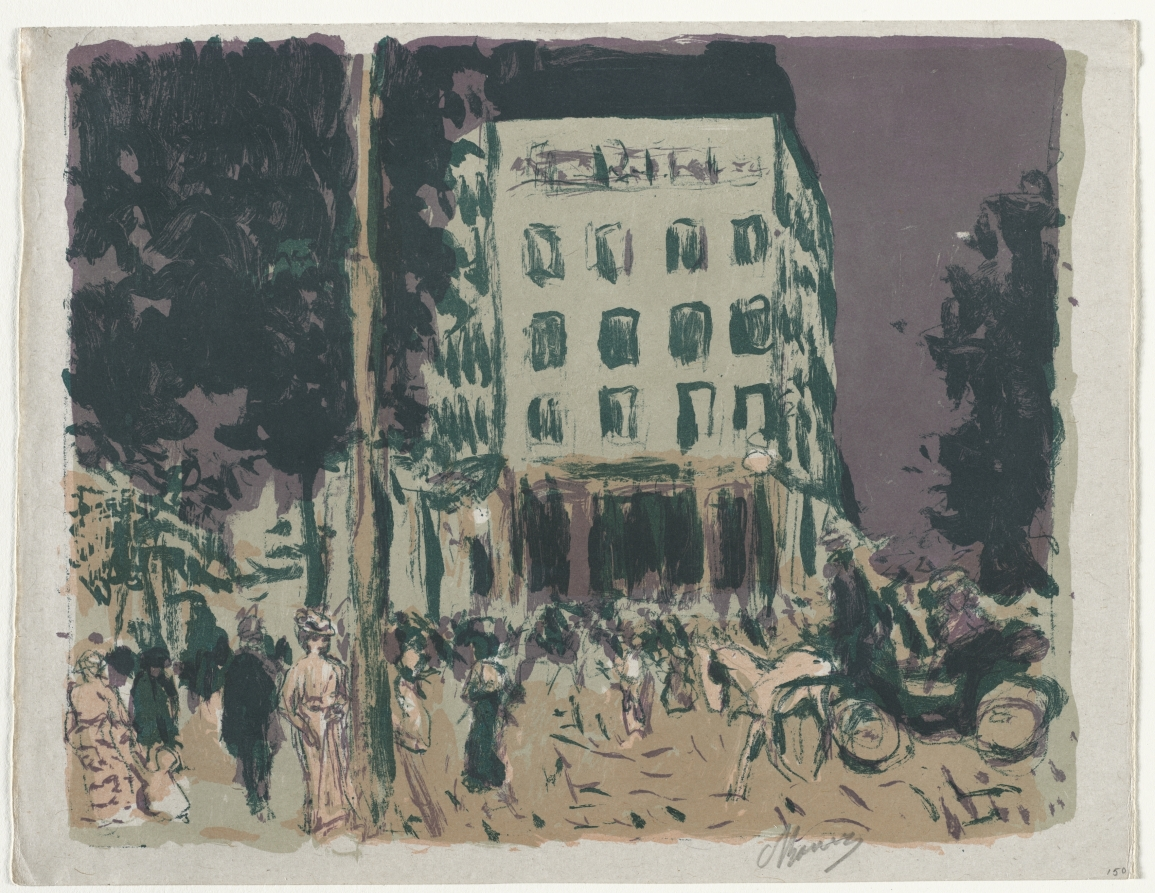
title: The Boulevards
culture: France, late 19th-early 20th Century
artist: Pierre Bonnard (French, 1867–1947)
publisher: Insel Verlag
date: 1900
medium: color lithograph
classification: Print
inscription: signed, lower right, in graphite: P Bonnard